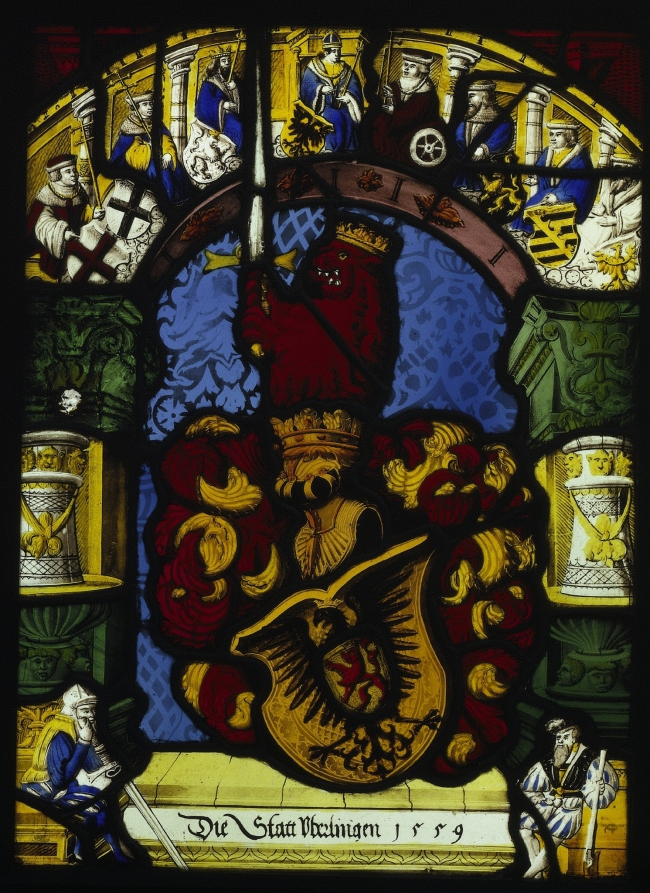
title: Arms of Ueberlingen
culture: Switzerland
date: 1559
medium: pot metal and white glass, silver stain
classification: Glass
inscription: below the coat of arms: "Die Statt Uberlingen 1559."